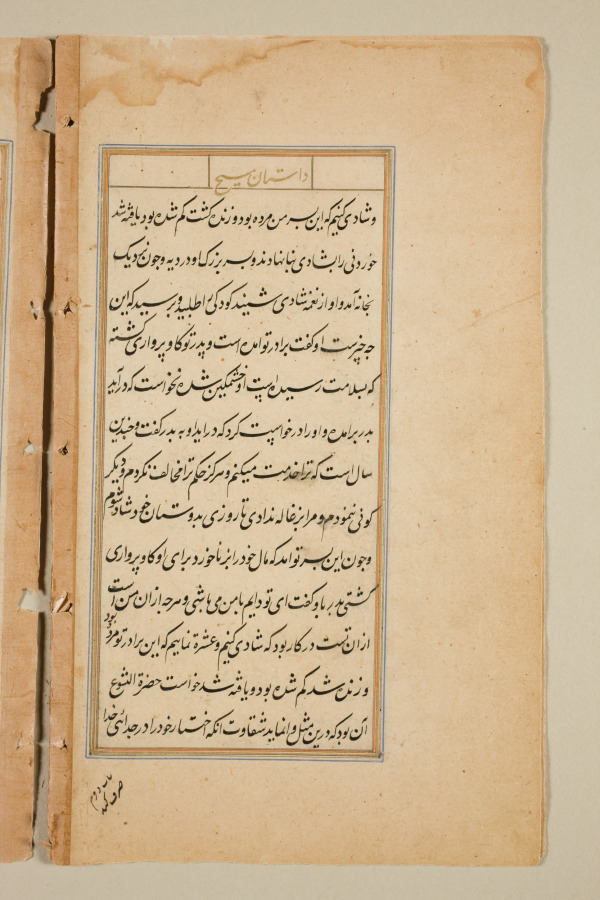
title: Text page from a Mirror of Holiness (Mir’at al-quds) of Father Jerome Xavier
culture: Mughal India, Allahabad, made for Prince Salim (1569–1627)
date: 1602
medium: Ink and gold on paper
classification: Manuscript